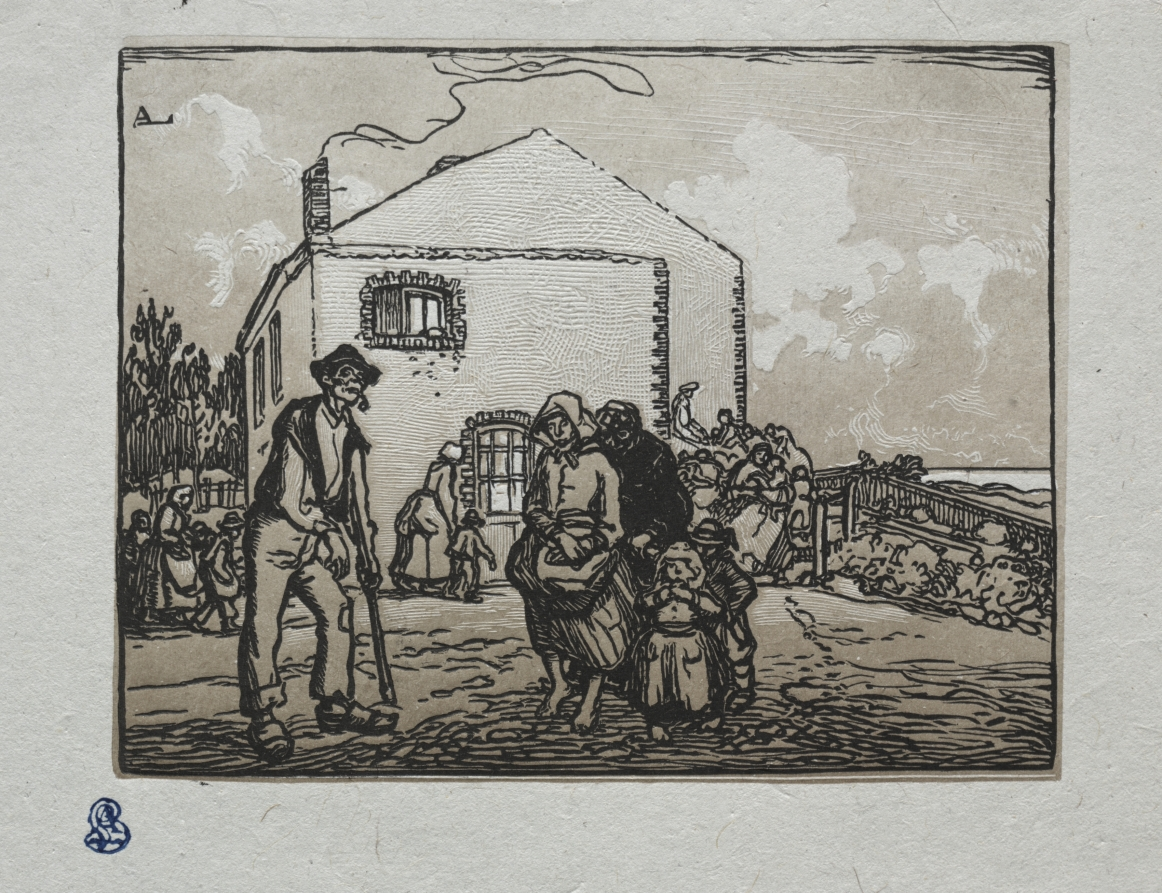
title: The Beggars at the Last House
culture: France, late 19th-early 20th Century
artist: Auguste Louis Lepère (French, 1849–1918)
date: 1905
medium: chiaroscuro woodcut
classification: Print